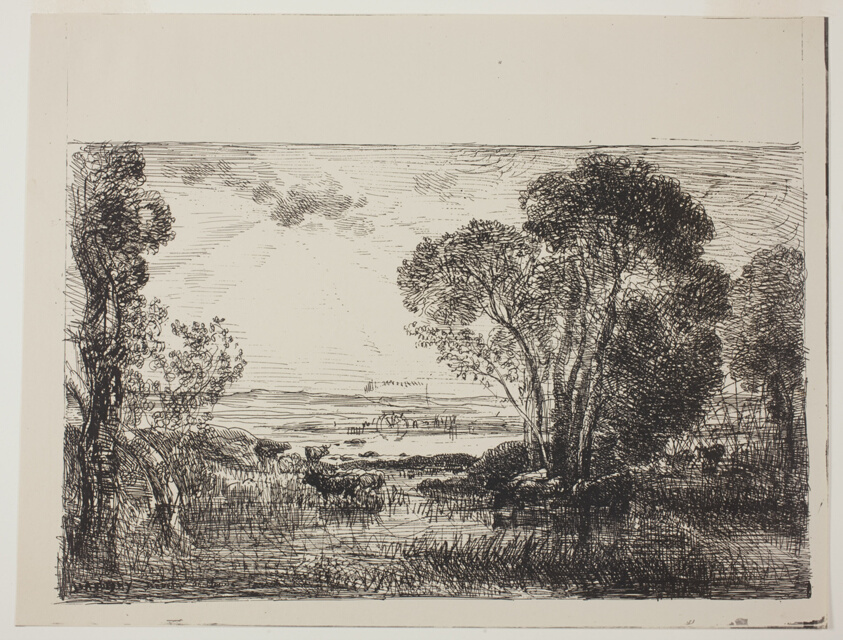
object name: Print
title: The Hydraulic Machine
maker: Charles François Daubigny (French, 1817-1878)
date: 1862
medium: Cliché-verre on ivory photographic paper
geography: France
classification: cliché-verre; print; prints and drawing